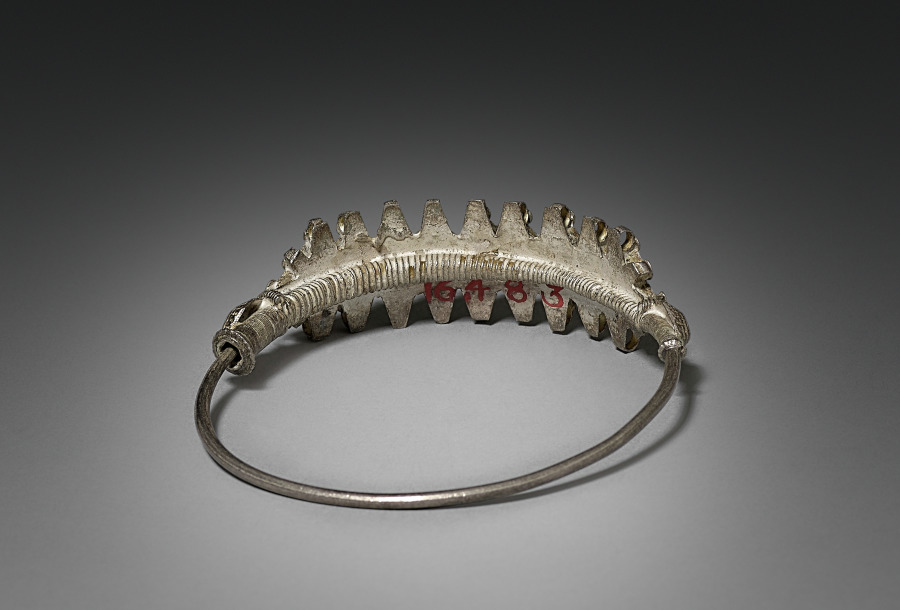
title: Nose Ring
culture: India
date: early 1900s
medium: silver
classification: Jewelry